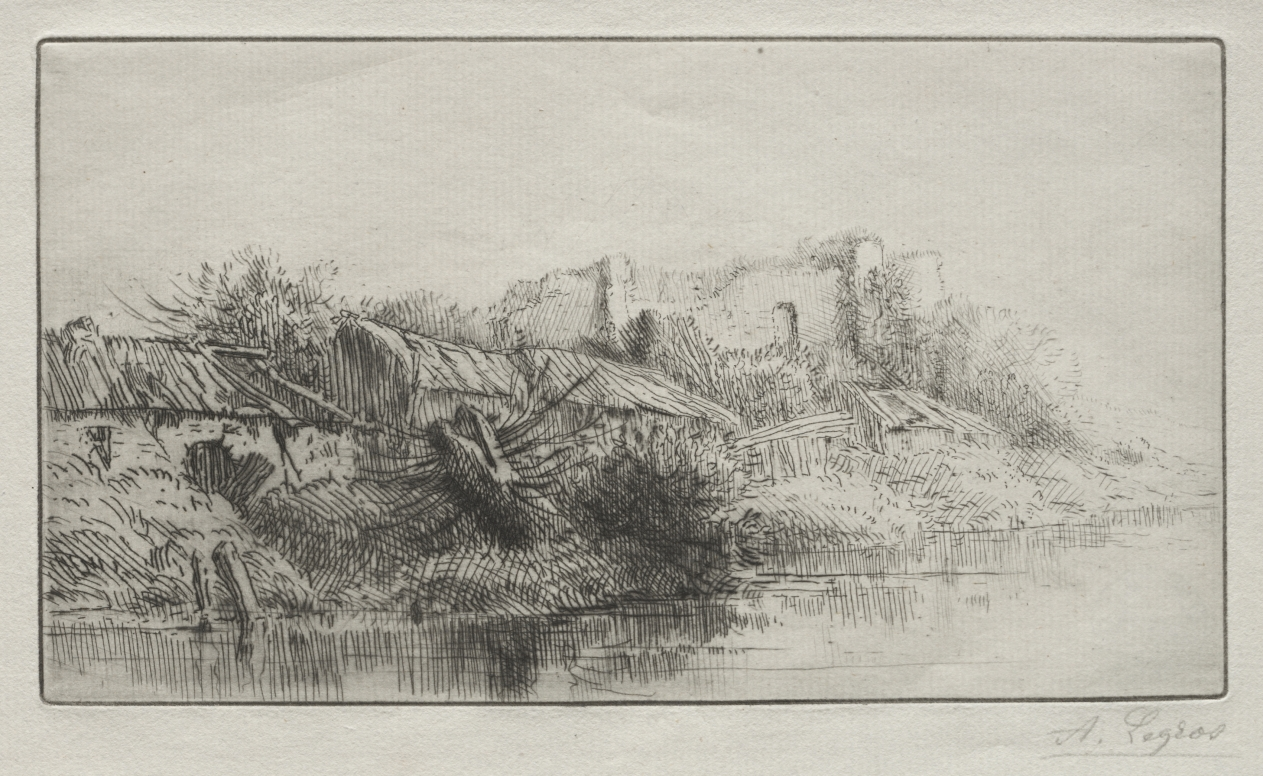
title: Abandoned Village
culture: France, 19th-20th century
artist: Alphonse Legros (French, 1837–1911)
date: c. 1857–1911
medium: etching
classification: Print